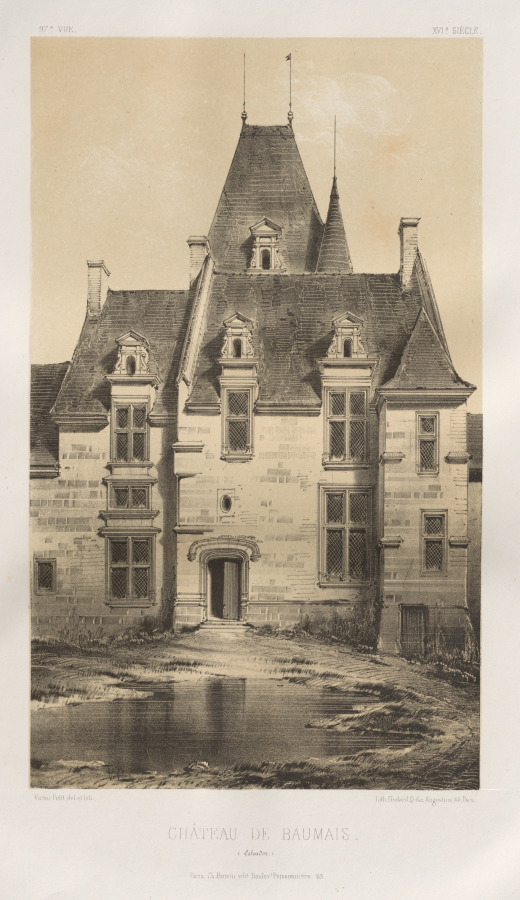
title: Architecture Pittoresque ou Monuments des XVeme. Et XVIeme. Siecles: Chateaux de France des XV et XVI Siecles: Pl. 97, Château de Baumais (Calvados)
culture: France, 19th century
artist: Victor Petit (French, 1817–1874)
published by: Charles Boivin (publisher and editor); Lith de Godard a Paris (printer)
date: 1860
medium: lithograph with tint stone, from portfolio of 100 lithographs with tint stone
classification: Print